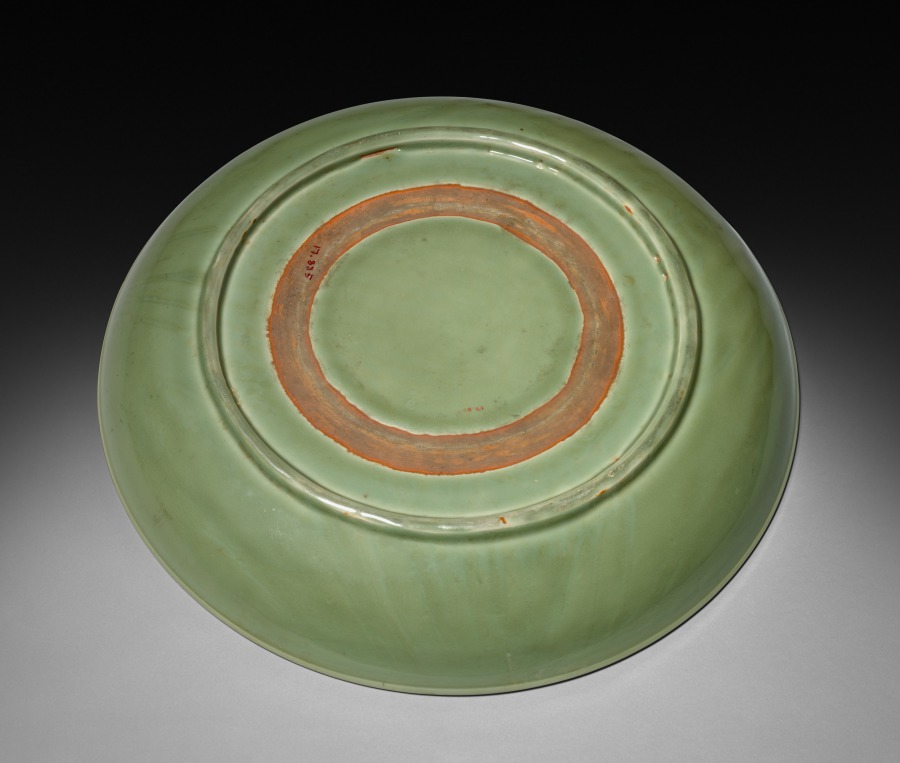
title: Platter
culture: China, Ming dynasty (1368–1644)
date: 1400s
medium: porcelain with celadon glaze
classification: Ceramic